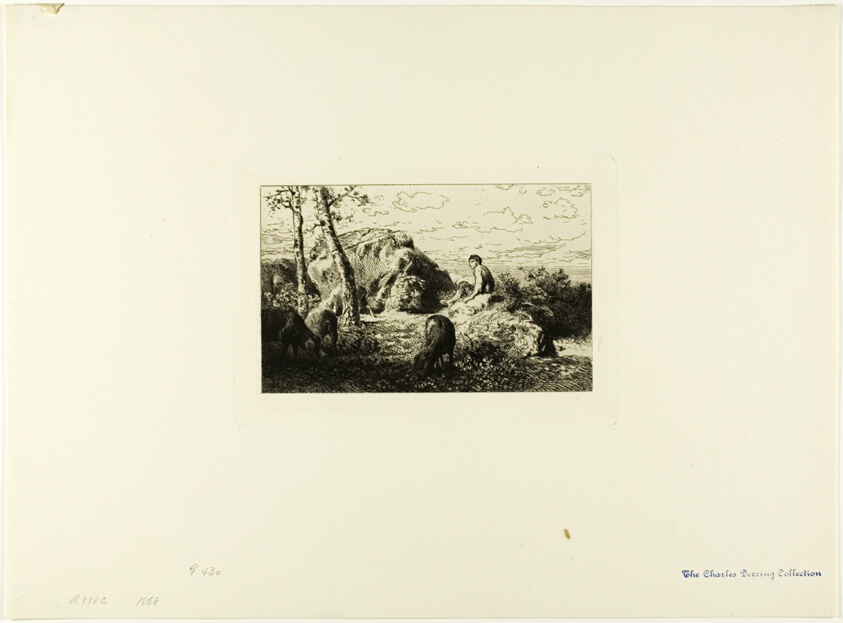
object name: Print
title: The Prodigal Son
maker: Charles Émile Jacque (French, 1813-1894)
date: c. 1868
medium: Etching on ivory laid paper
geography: France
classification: etching; print; prints and drawing